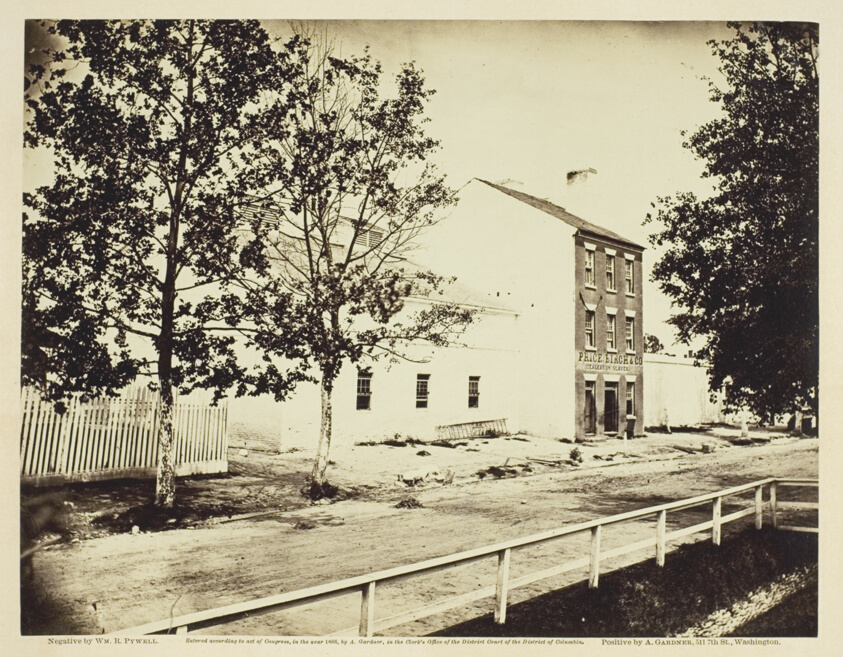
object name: Photograph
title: Slave Pen, Alexandria, Virginia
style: 19th century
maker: William R. Pywell (American, 19th century)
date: August 1862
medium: Albumen print, pl. 2 from the album "Gardner's Photographic Sketch Book of the War, vol. 1" (1866)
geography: United States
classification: albumen silver print; photographic process; photography; photograph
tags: Collected by Hugh Edwards, Gardner's Photographic Sketch Book